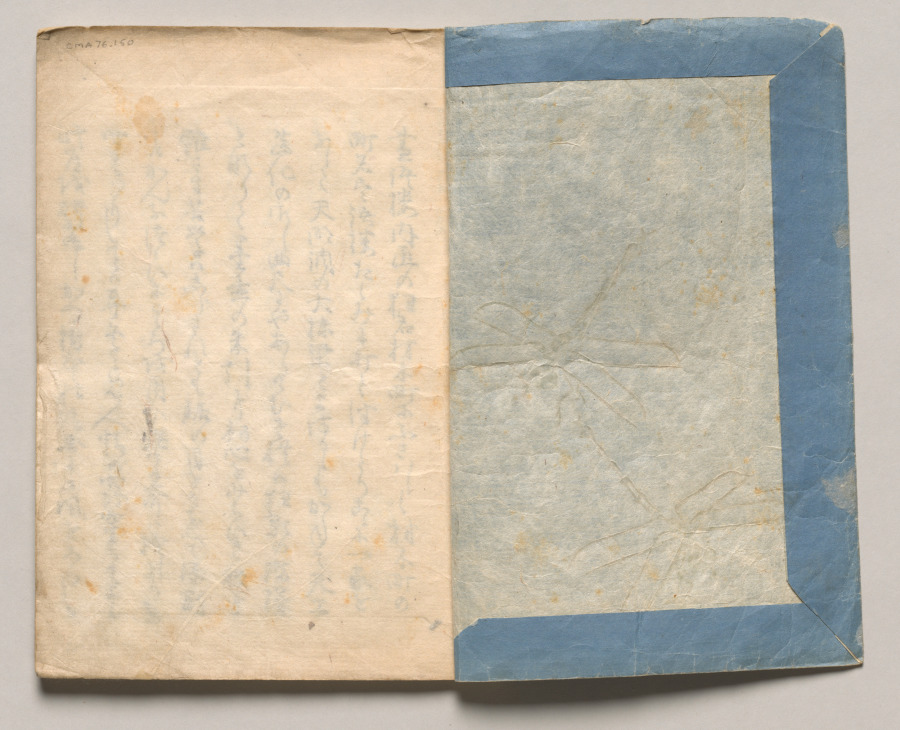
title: Volume One of People of Japan in Light Verse (Kyōka)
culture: Japan, Edo period (1615–1868)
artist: Utagawa Hiroshige (Japanese, 1797–1858)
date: 1857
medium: Woodblock-printed book; ink and color on paper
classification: Bound Volume